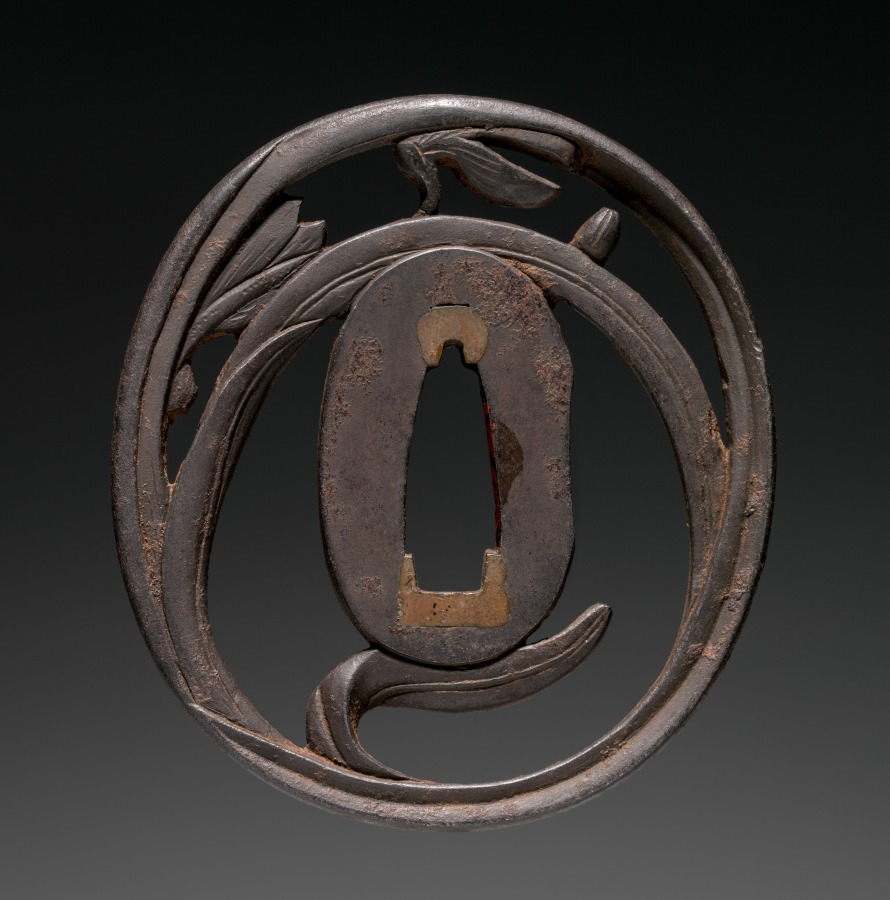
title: Sword Guard (Tsuba)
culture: Japan, Edo period (1615–1868)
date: c. 1750–75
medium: iron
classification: Arms and Armor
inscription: Signature: Tomonobu